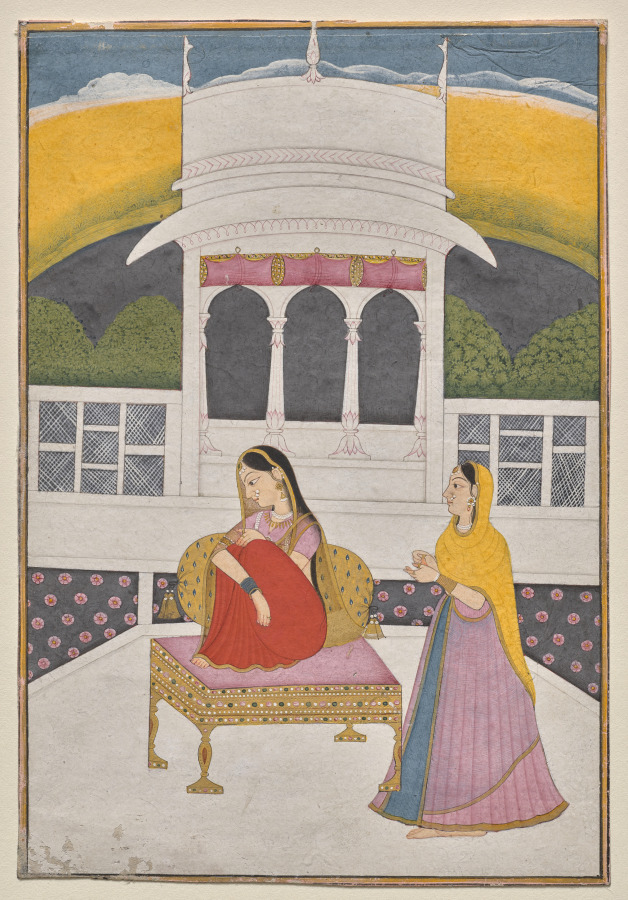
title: A Nayika, probably Proshitaperyasi Nayika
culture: Northern India, Pahari kingdoms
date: c. 1740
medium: Gum tempera on paper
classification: Painting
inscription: Verso: (in English) No. 1 D Radha waiting to Krishna